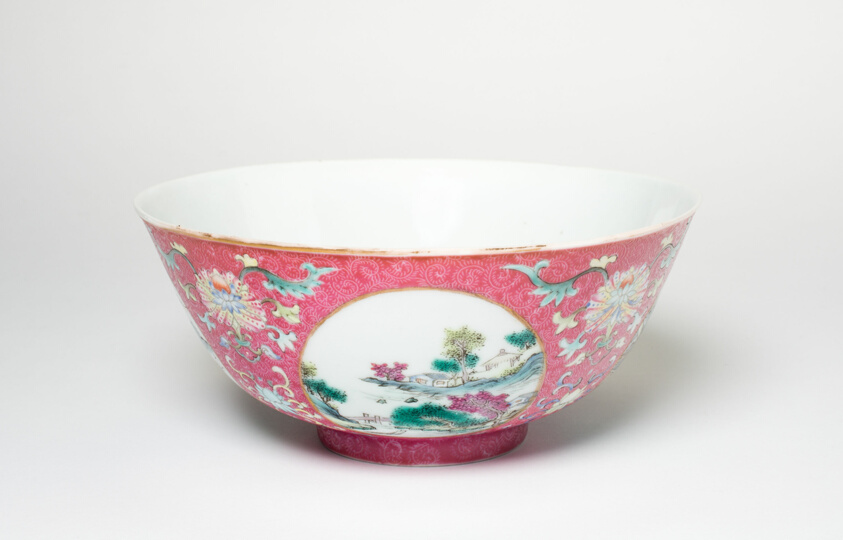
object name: Vessel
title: Pink-Ground Medallion Bowl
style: Chinese (culture or style)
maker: China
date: Qing dynasty (1644–1911), Qianlong reign mark and period (1736–1795)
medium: Porcelain with overglaze enamel decoration and painted gold rim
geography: China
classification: bowl; porcelain; dish (vessel); ceramics; asian art; vessel